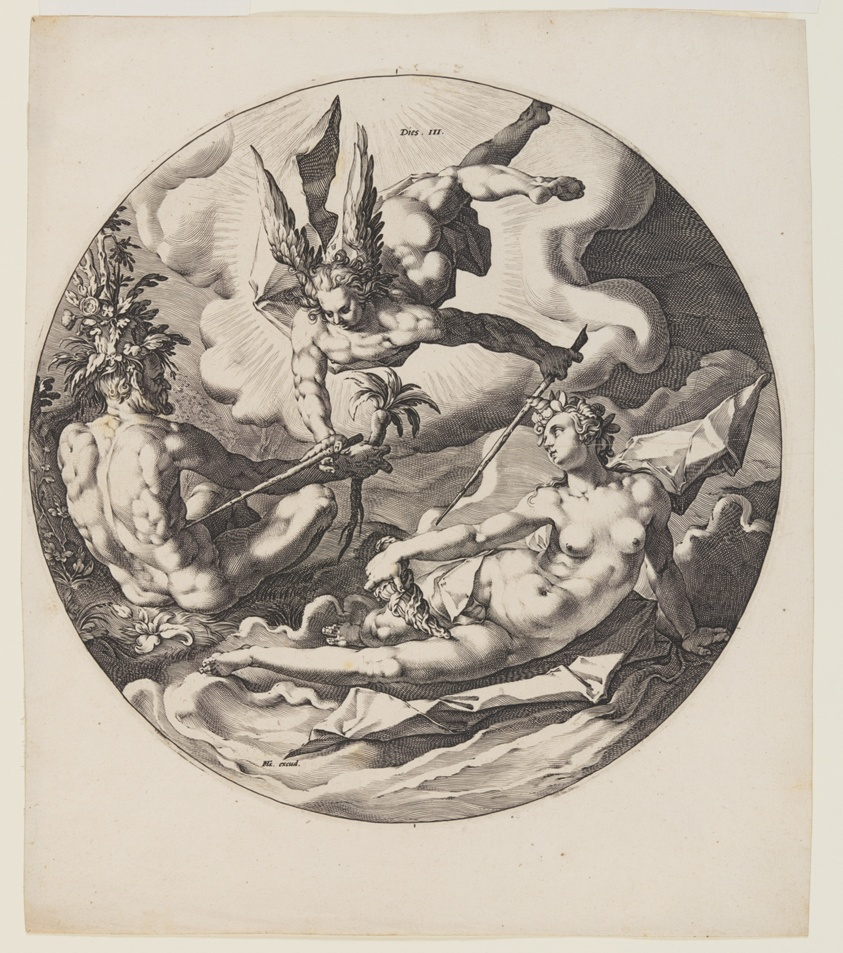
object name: Print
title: The Third Day, plate 4, from Creation of the World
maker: Jan Harmensz Muller (Dutch, 1571–1628); after Hendrick Goltzius (Dutch, 1558–1617)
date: 1590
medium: Engraving on ivory laid paper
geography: Netherlands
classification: print; paper; prints and drawing; engraving